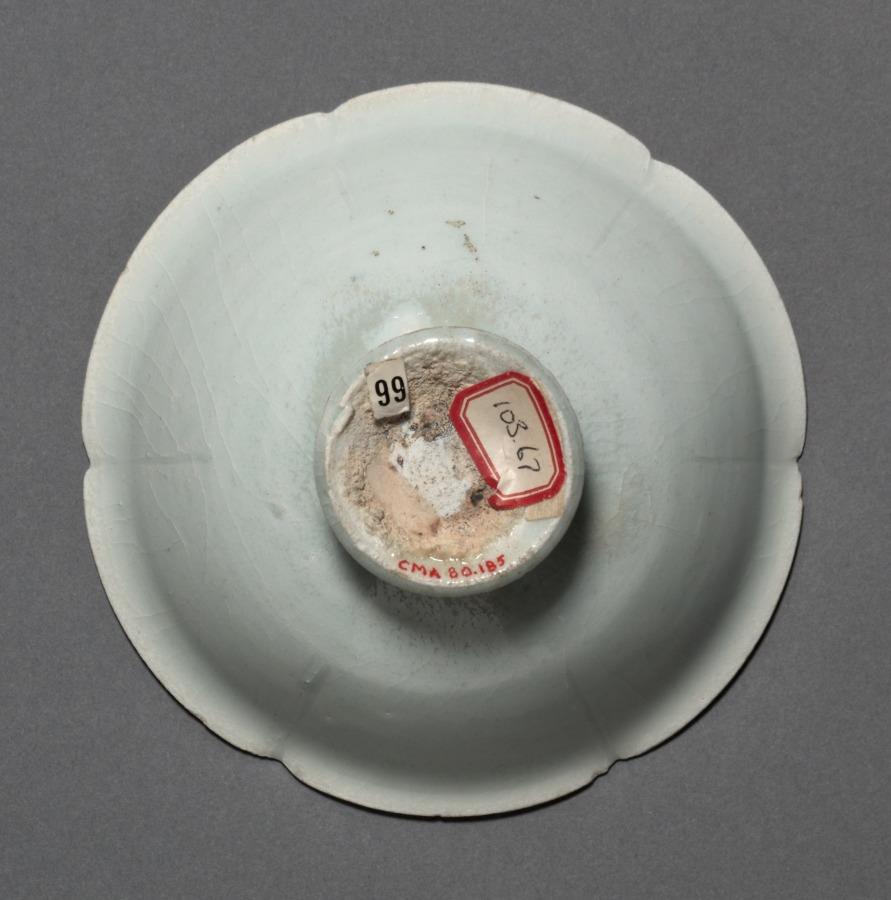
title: Cup and Stand (Cup)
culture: China, Jiangxi Province, Jingdezhen, Southern Song dynasty (1127–1279)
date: 1100s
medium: Porcelain with pale bluish-white glaze, qingbai ("blue-white") ware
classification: Ceramic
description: The kilns of Jingdezhen in Jiangxi province produced an extremely delicate porcelain made from the local resources of kaolin (white China clay) and petuntse (a feldspathic rock called china stone). It is glazed with a clear bluish-white glaze, thus the name qingbai (blue-white) or yingqing (shadowy blue) for this type of ware.